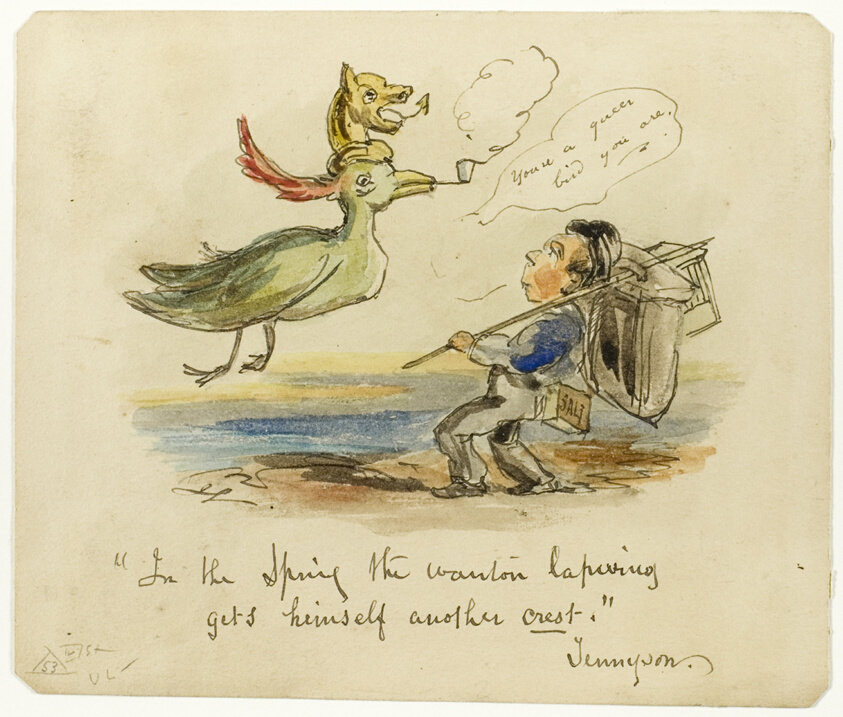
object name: Drawing and Watercolor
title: In the Spring the Wanton Lapwing gets himself another Crest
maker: George Cruikshank (English, 1792-1878)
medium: Watercolor and pen and black ink, over traces of graphite, on cream wove paper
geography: England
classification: watercolor; drawings (visual works); prints and drawing